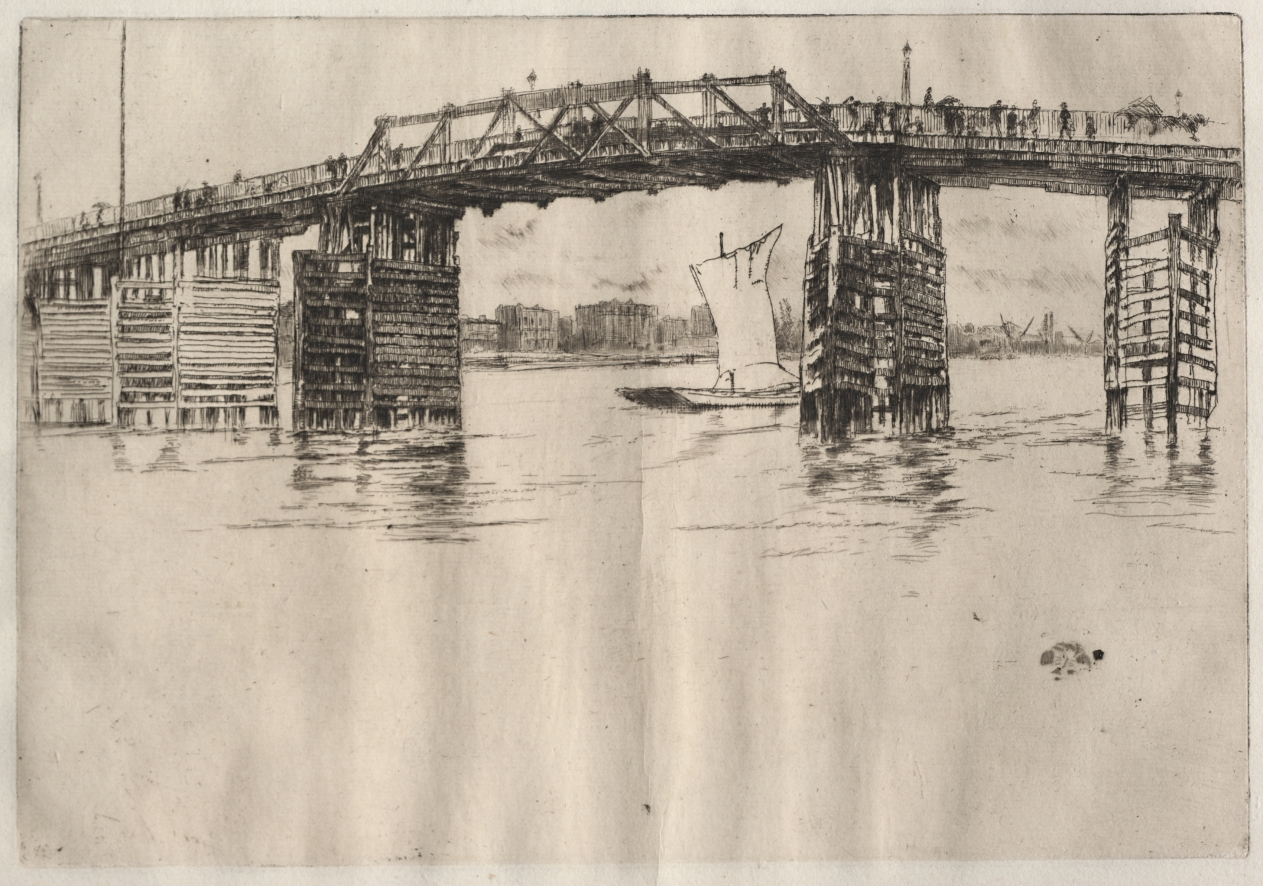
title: Old Battersea Bridge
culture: America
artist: James McNeill Whistler (American, 1834–1903)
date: 1879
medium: etching and drypoint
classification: Print